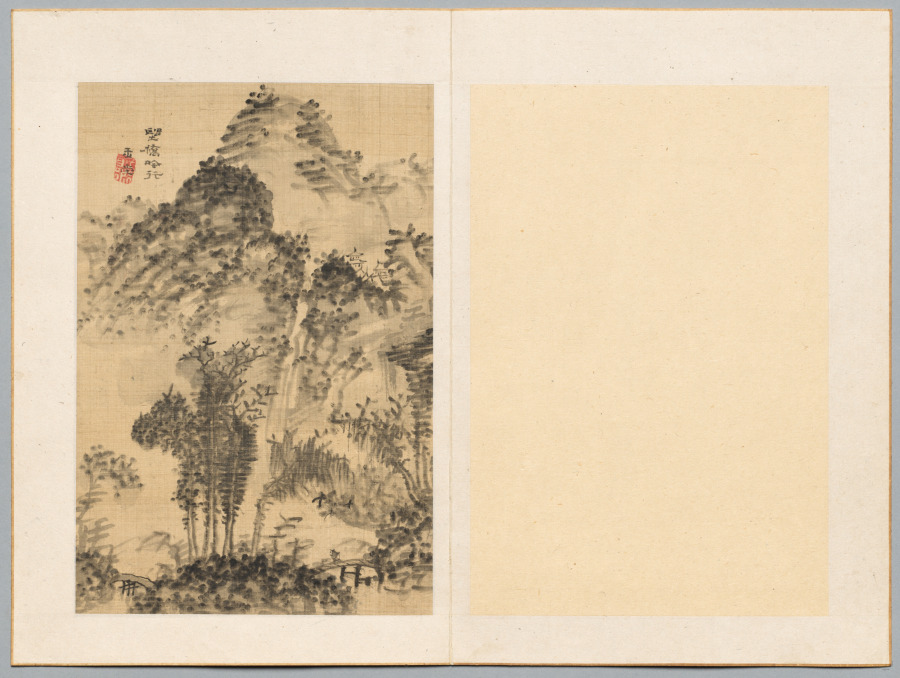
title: Wild Bridge, Poet's Walk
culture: Japan, Edo period (1615–1868)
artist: Uragami Gyokudō (Japanese, 1745–1820)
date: late 1700s-early 1800s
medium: leaf from a pair of folding albums; ink and light color on paper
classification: Portfolio